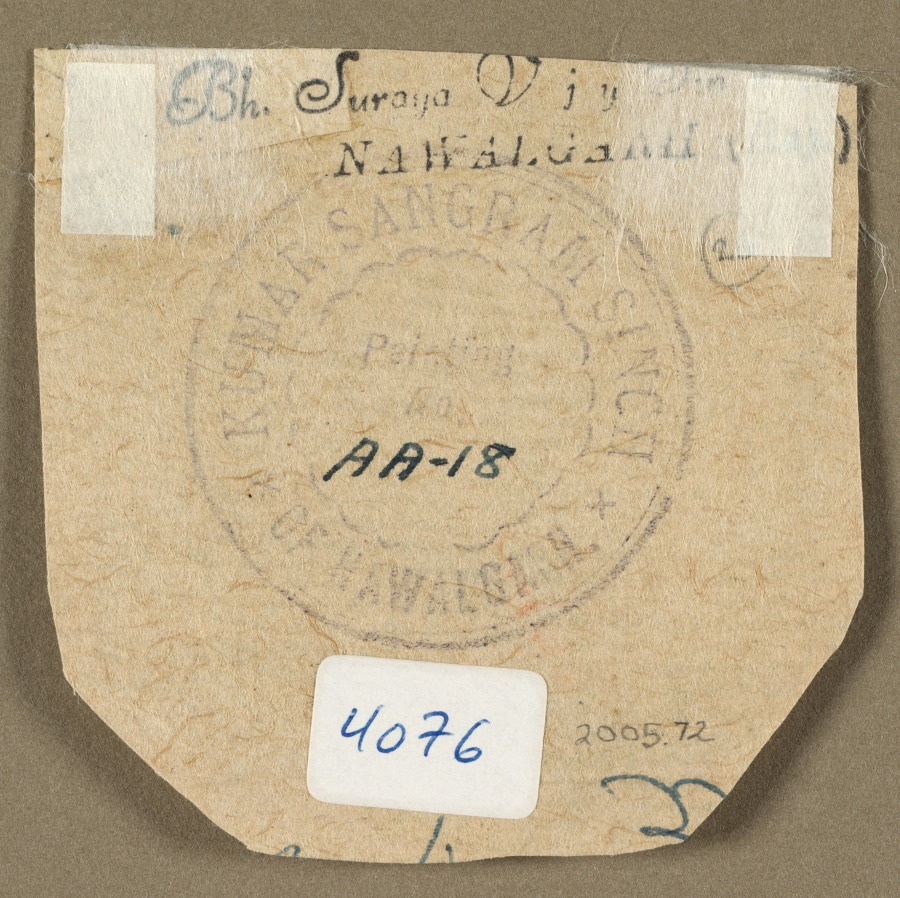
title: Head of a Young Man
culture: India, Company School, Sangram Singh seal on reverse, early 19th century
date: early 1800s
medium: drawing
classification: Drawing